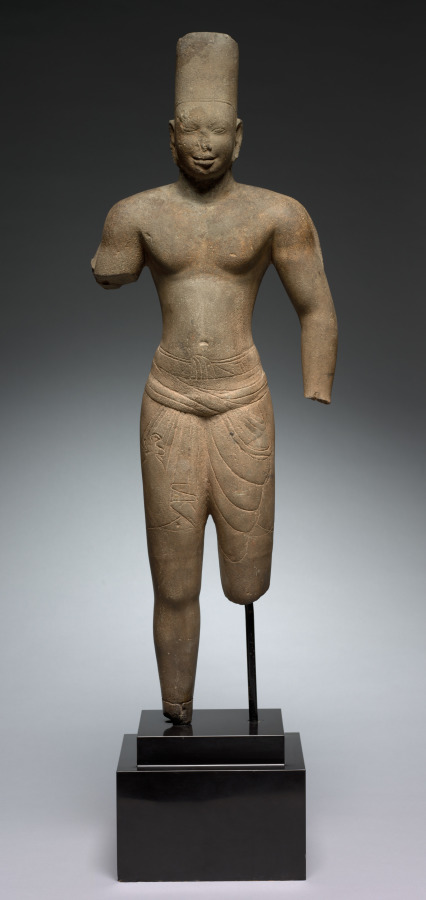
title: Vishnu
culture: Cambodia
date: 650–99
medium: gray sandstone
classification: Sculpture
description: The muscular physique, sensitive smile, and flat-topped high crown are characteristics of Vishnu images made during the pre-Angkorian period (c. 550–802) in Cambodia. This sculpture probably was the sole object of worship in a small brick temple sanctum.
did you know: The god wears a short garment (sampot) tied to form a loop on the left with the hanging ends on the right thigh.